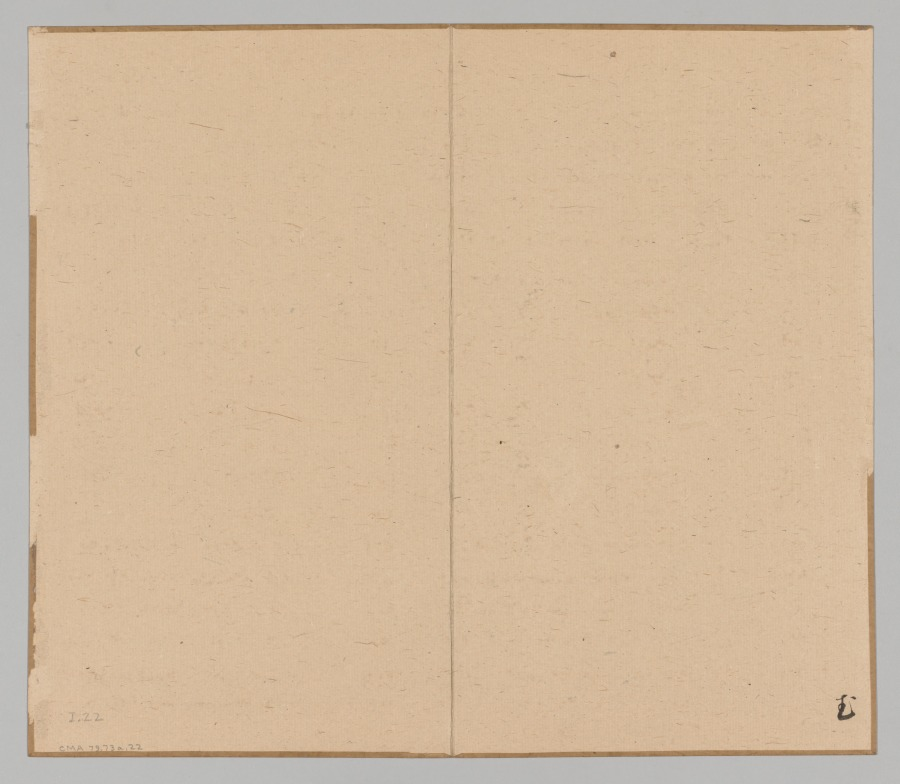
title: Reverberations of Taiga, Volume 1 (leaf 22)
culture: Japan, Edo period (1615–1868)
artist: Aoki Shukuya (Japanese, d. 1802)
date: mid- to late 1700s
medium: double-leaf from a pair of albums; ink and light color on paper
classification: Portfolio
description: Traditionally, young painters in Japan began their studies with an established master-painter. The master's compositions invariably became models that the apprentice copied to learn various ink and brush techniques. Shukuya was a pupil of the famous Kyoto artist Ikeno Taiga, whose style is reflected in these sketches of rocks, trees, and mountains.